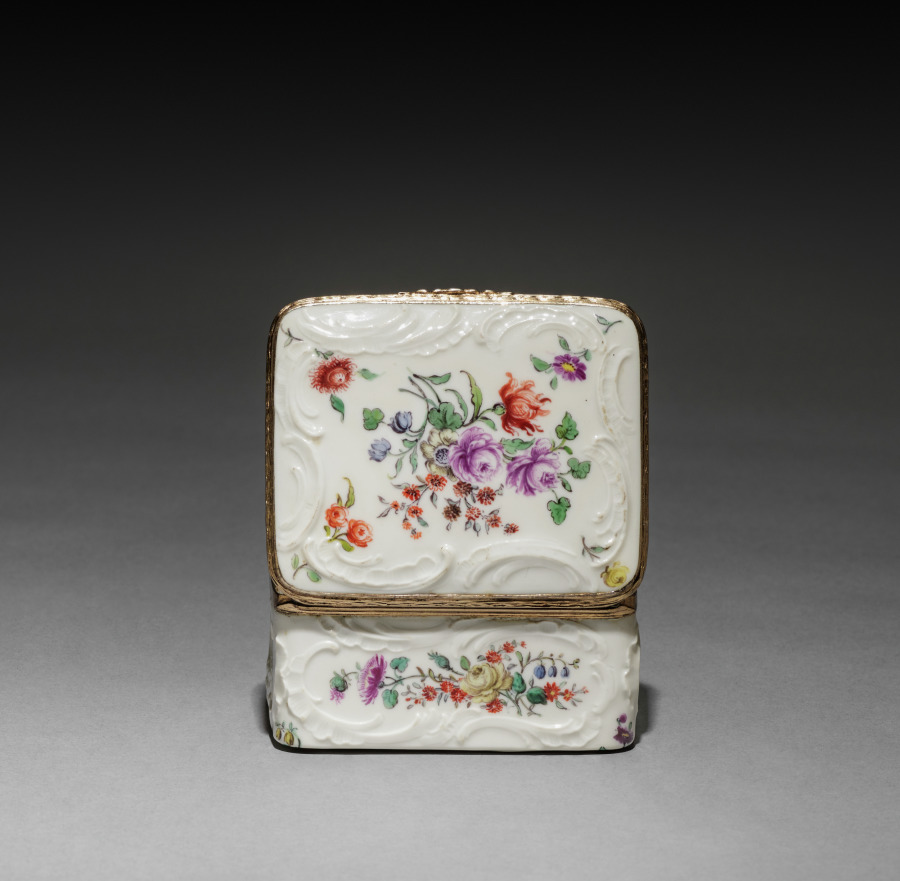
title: Box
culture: South Germany, 18th century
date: 1750–1775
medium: porcelain with silver-gilt mounts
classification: Miscellaneous